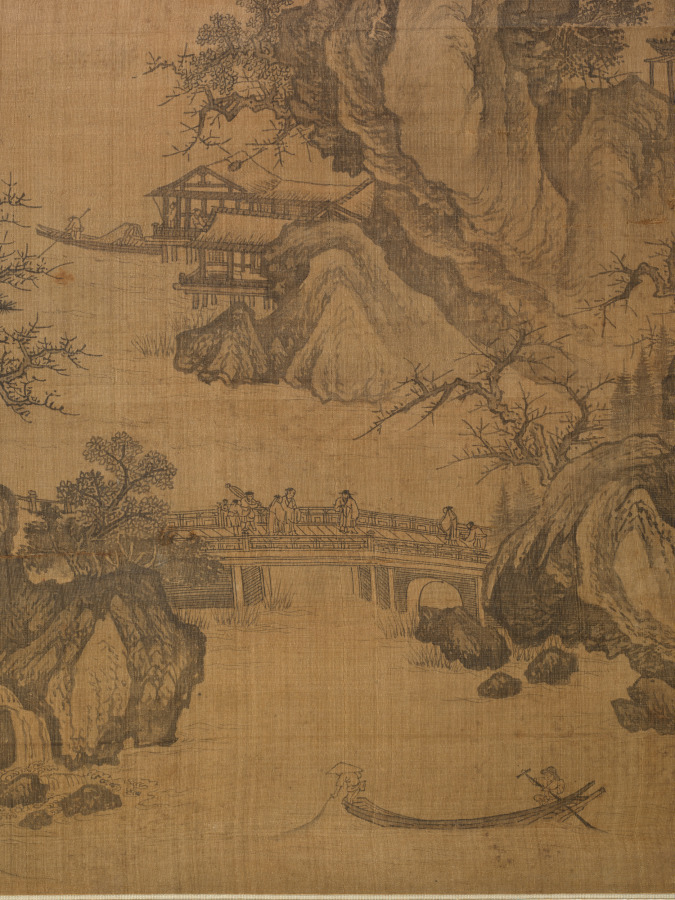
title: Mountain Market, Clear with Rising Mist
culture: Korea, Joseon dynasty (1392–1910)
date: early 1500s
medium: Hanging scroll; ink on silk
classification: Painting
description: This painting depicts several vignettes of the scholar-hermit’s various activities. In the lower left corner, the scholar-hermit is portrayed welcoming his guest in the courtyard. In the middle section on the lower bottom, the scholar and his guest are shown encountering another traveler on the bridge and exchanging their greetings. After crossing the bridge, the scholar visits a friend who lives in a compound of multiple buildings. The two friends decide to take a short walk. Both appear in a terraced cliff, enjoying a mountain vista and the fragrance of an old pine tree carried by the gentle wind. The scholar continues his journey with his two servants. They are portrayed crossing a winding wooden bridge. Right beyond the colossal rocky mountain, a panoramic view to a bustling market place unfolds, suggesting that it may be the place where the scholar-hermit’s entourage would visit. Perhaps the scholar need to buy items such as books, rolls of papers, and brushes, all essential to scholarly life. Toward the upper left corner, another group of travelers is landing on the river bank that leads to the city gate; they may be headed to the multistoried Buddhist stupa nestled on the top of the mountains.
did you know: Due to its stylistic features, this painting has long been believed to be a Chinese painting of the Northern Song period, dated to the 12th century.